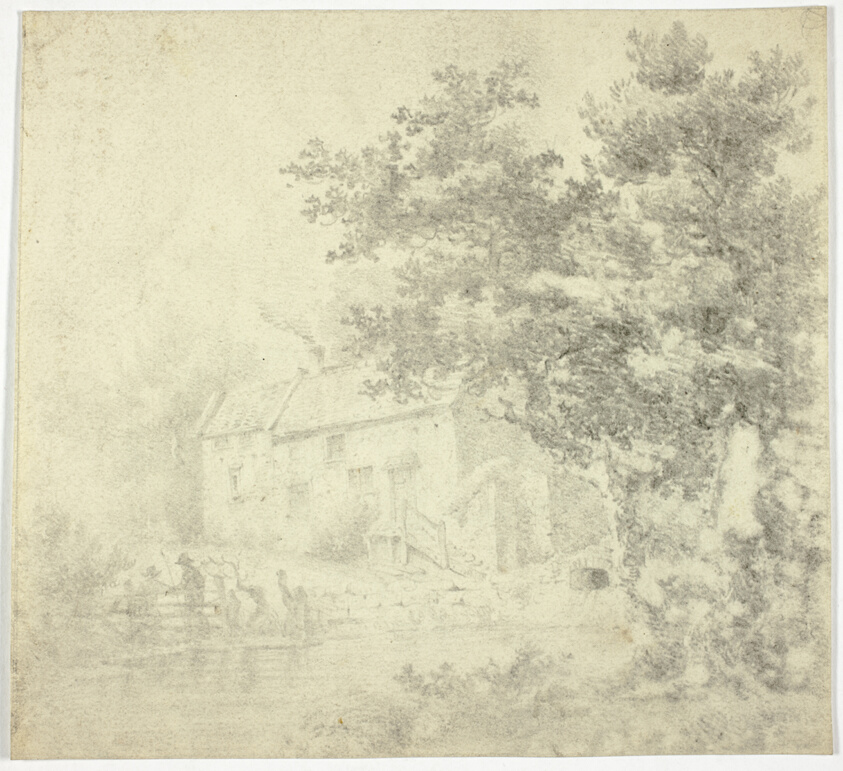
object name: Drawing and Watercolor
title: Mill (recto); Tree (verso)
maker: Unknown Artist (British, 18th century); or possibly Thomas Gainsborough (English, 1727-1788)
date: n.d. (recto); 1780/1789 (verso)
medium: Black chalk (recto and verso) on off white wove paper, tipped onto cream wove paper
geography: England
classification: charcoal; drawings (visual works); prints and drawing